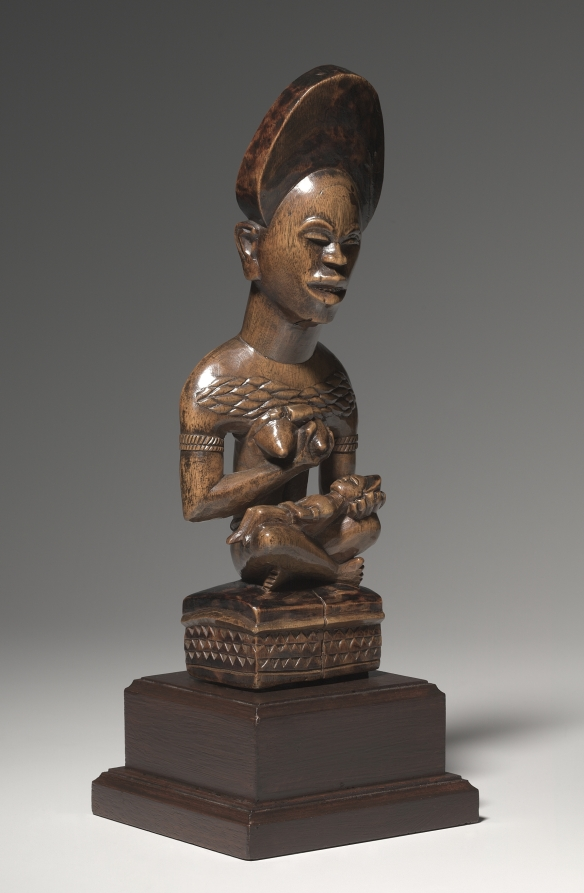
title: Woman and Child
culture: Africa, Central Africa, Democratic Republic of Congo, Yombe-style carver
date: mid- to late 1800s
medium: Wood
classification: Sculpture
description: This mother-and-child figure was probably part of a cult concerned with the treatment of infertility. Both her jewelry and her seated pose indicate that the woman occupied a high rank in her community. Her miter-shaped hairstyle, chiseled teeth, and raised body scars--considered to be marks of beauty and perfection--signal that the woman incarnates the founding ancestor of a kinship group.